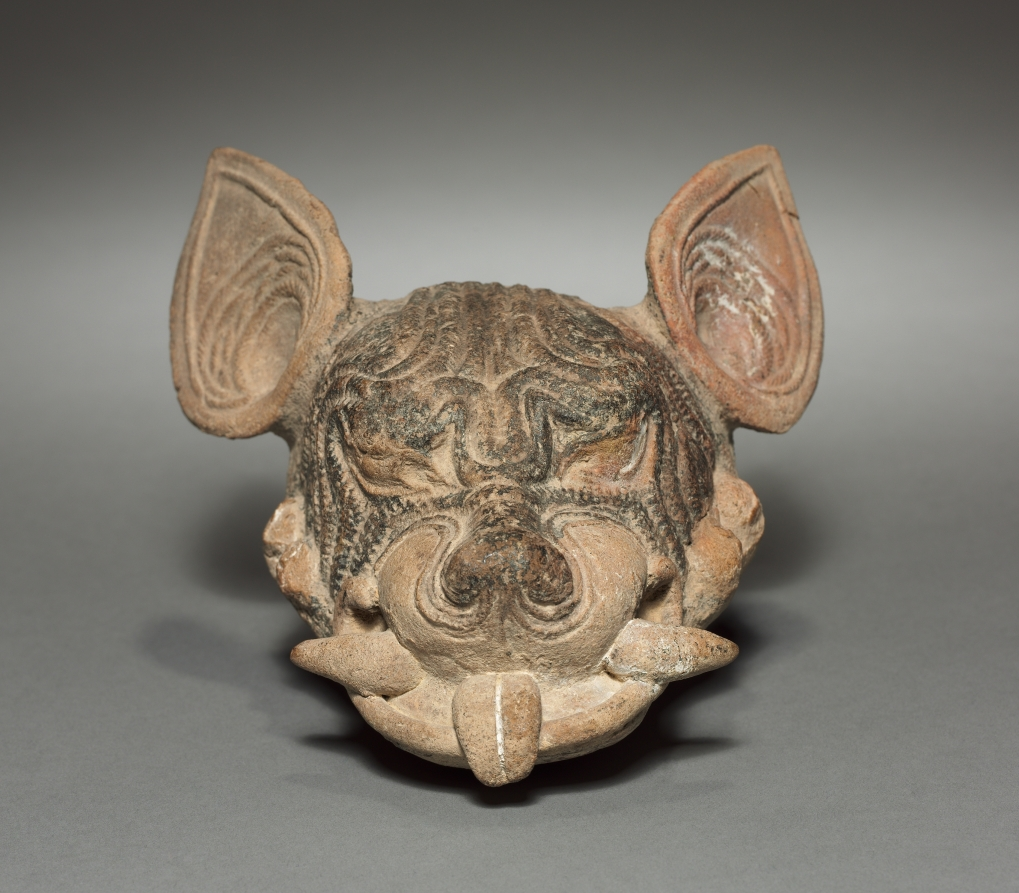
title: Dog Head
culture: Mexico, Gulf Coast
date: 500–1000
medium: earthenware, asphalt and resin paint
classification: Sculpture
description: This dog's snarl and protruding fangs lend him a sinister expression. Although pierced for suspension, the head seems too large and fragile to have been a pendant. Press-molds, used to create the dog's face and ears, were commonly used in the Gulf Coast region, where asphalt occurs naturally and was applied to pottery as a paint after firing.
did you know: This ceramic was analyzed using thermoluminescence dating; it was fired between 900 and 1,500 years ago.